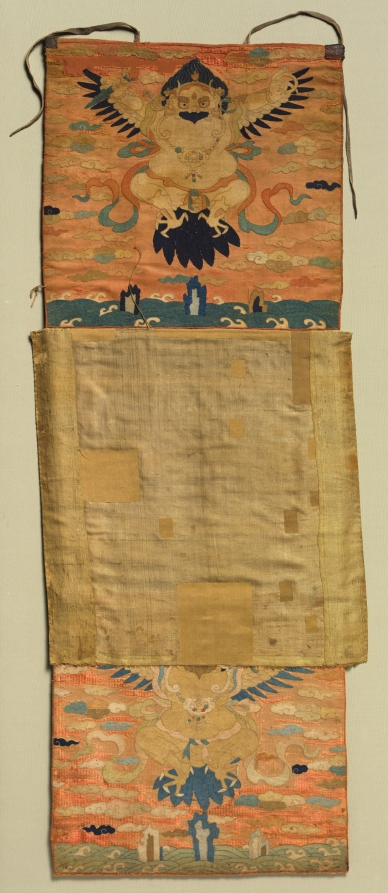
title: Vajrapani Embroidered Mount with Garuda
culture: China and Tibet, Embroidery: China, Yuan dynasty (1279–1368); painting: Tibet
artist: Choying Dorje, the Tenth Black Hat Karmapa (Tibetan, 1604–1674)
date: painting 1600s, embroidery c. 1300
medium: Opaque watercolor, gold, and silver on silk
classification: Embroidery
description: The painting depicts the Buddhist protector who holds (pani) the thunder bolt (vajra) in his right hand. He kneels in reverence and holds his left hand in a gesture of salute. This unusual image appears to have been the vision of a Tibetan monastic patriarch known for creating his own inventive paintings and sculptures. Sewn to the painting are Chinese damask borders and rare embroideries dating to the Chinese Yuan dynasty (1279–1368). They depict man-eagle figures known as Garuda, a form occasionally assumed by Vajrapani.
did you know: Vajrapani sometimes takes the form of Garuda, enemy of snakes.